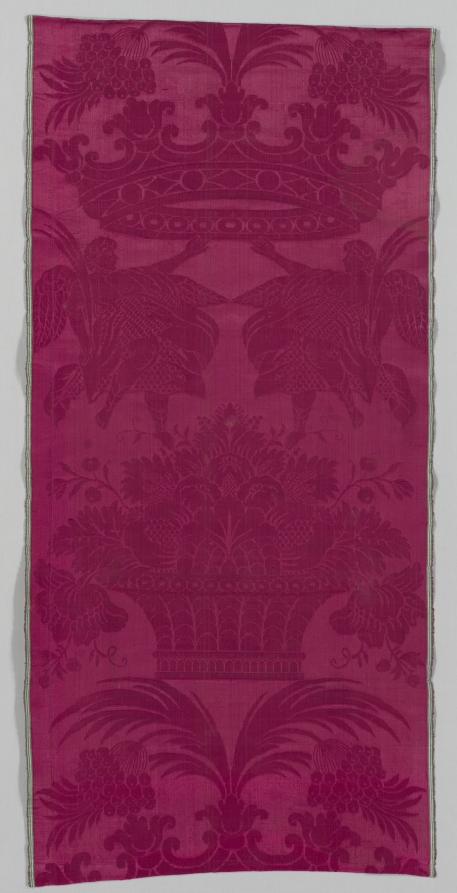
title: Silk Fragment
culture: Italy, late 17th century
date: late 1600s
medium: damask, silk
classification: Textile